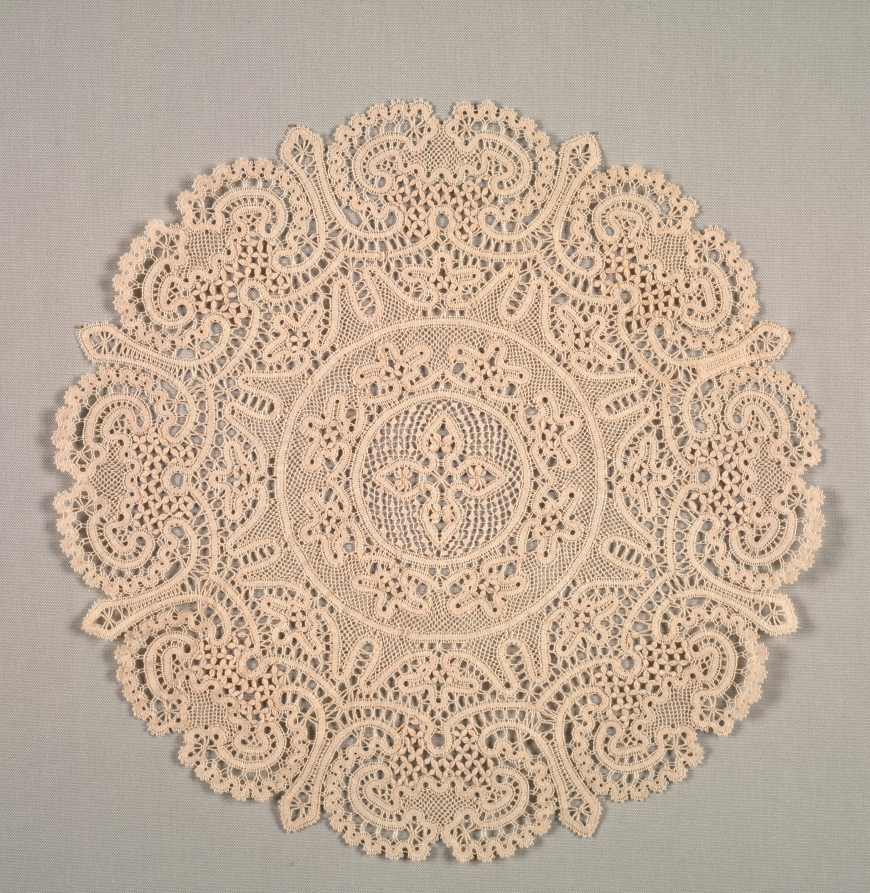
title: Lace Circle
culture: Italy, Abruzzi, Pescocostanzo, l'Aquila, 19th century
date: 1800s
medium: bobbin lace with embroidery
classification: Lace